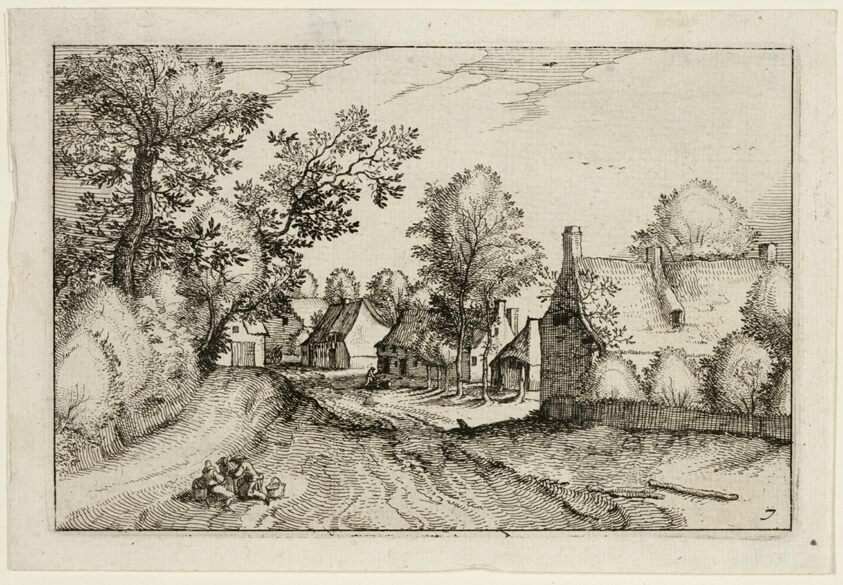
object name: Print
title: A Village Road, plate seven after Pictures of Farms, Country Houses and Rustic Villages (Praediorum villarum et rusticarum casularum icones)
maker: Claes Jansz. Visscher (Dutch, 1587-1652); after Unknown Flemish Artist, misidentified as Pieter Bruegel, the elder (Flemish, 1525/30-1569)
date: 1612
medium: Etching in black on ivory laid paper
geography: Netherlands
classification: etching; print; prints and drawing